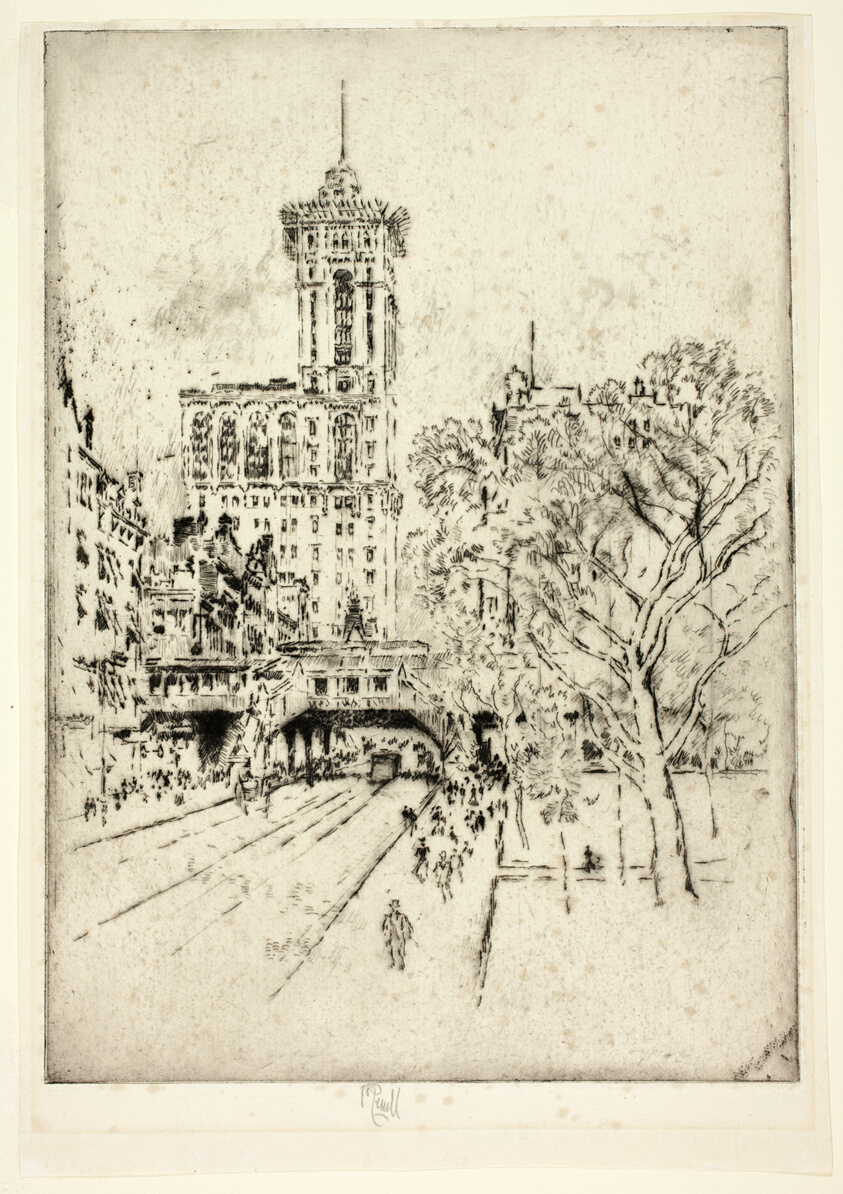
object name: Print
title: Times Building and 42nd Street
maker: Joseph Pennell (American, 1857-1926)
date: 1904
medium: Etching on ivory laid paper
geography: United States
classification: etching; drypoint; print; prints and drawing